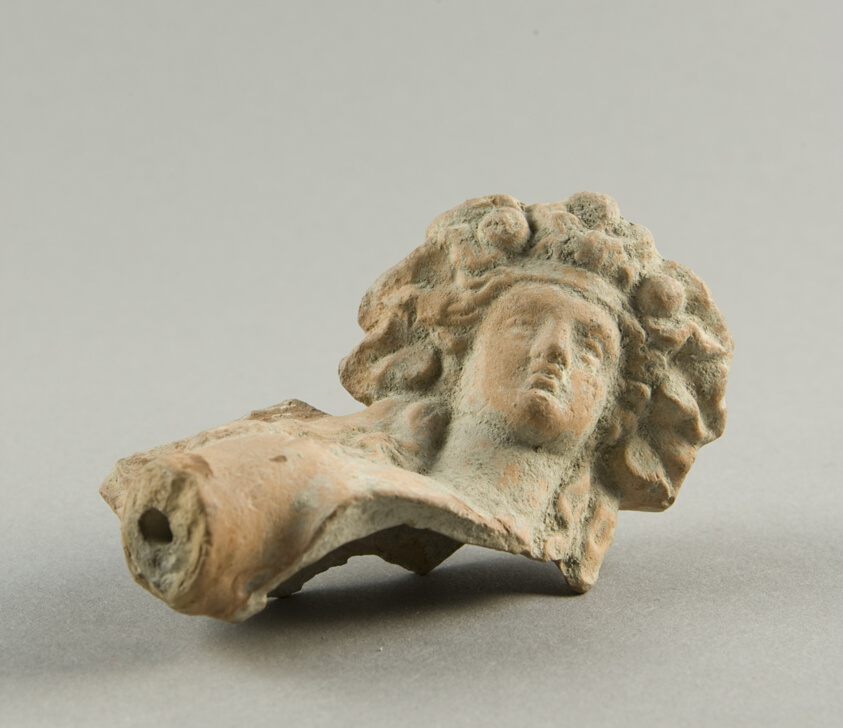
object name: Sculpture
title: Head of a Young Man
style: greek, ancient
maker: Greek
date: About 2nd century BCE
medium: terracotta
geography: Greece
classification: earthenware; ceramics; sculpture; ancient art